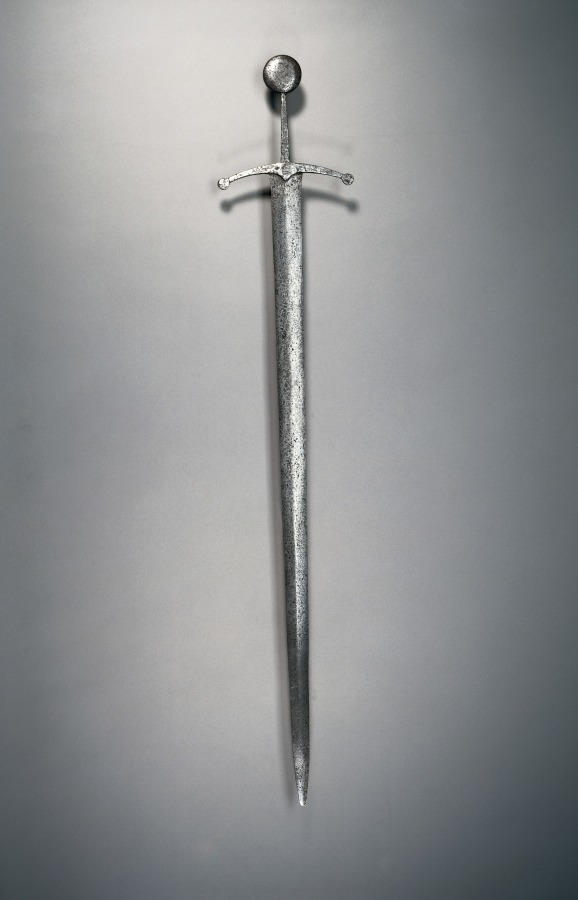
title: Sword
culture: European (unassigned), 15th century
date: 1400s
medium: steel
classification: Arms and Armor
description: The European sword is derived from the ninth-century Viking sword, which consisted of a straight double-edged blade and was suitable for slashing or thrusting. Throughout the medieval period swords became increasingly specialized weapons depending on whether it was intended to be used on horseback or on foot. A knight likely owned several swords according to his needs and preferences. Craftsman sought to achieve the technical superiority that in turn would provide his client with a distinct advantage.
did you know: Although now lost, this sword would have had a scabbard or sheath made of wood covered in leather to protect it from water so it wouldn't rust when not in use.